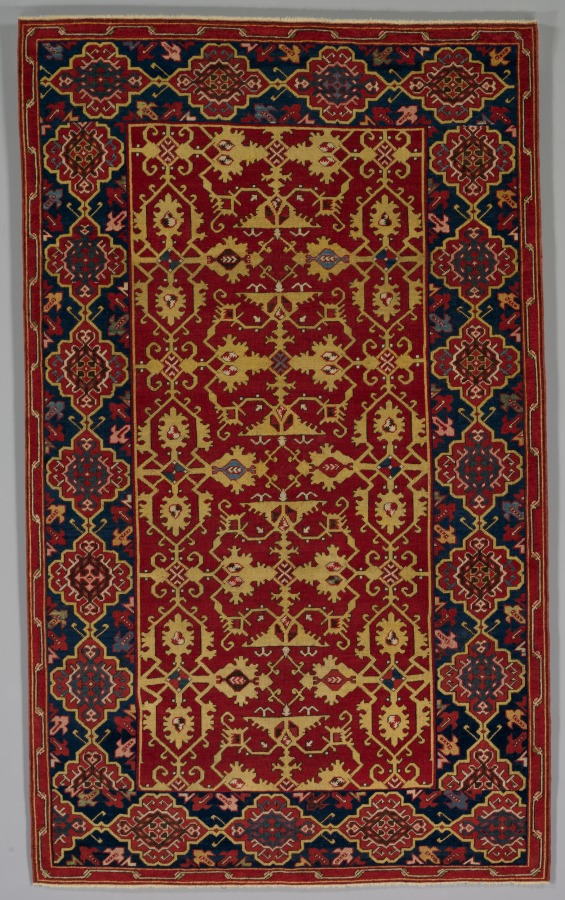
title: Classical Turkish Carpet with the Lotto Pattern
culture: Turkey, Ushak, Ottoman period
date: 1600–1650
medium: wool: symmetrical rug knot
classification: Textile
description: Lotto carpets have consistent color combinations and striking designs traceable to sources in Central Asia. In the central field, stylized yellow leaf patterns stand out against a red ground. The border is filled with cartouches on a dark blue background, and a simplified vine meanders along the outermost edge. In Islamic contexts, these vegetal patterns evoke paradise. Made primarily for export in the western Turkish center of Ushak between the 1400s and 1600s, Lotto carpets were named after the Venetian painter Lorenzo Lotto (1480–1556), who amply documented in oil paintings the way Europeans displayed this type of Turkish carpet as a sign of wealth and prestige. To preserve them, Europeans displayed Lotto carpets on tables, though they were originally made for use on the floor.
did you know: Lotto carpets were depicted in some 200 paintings during the 16th century in the Netherlands.